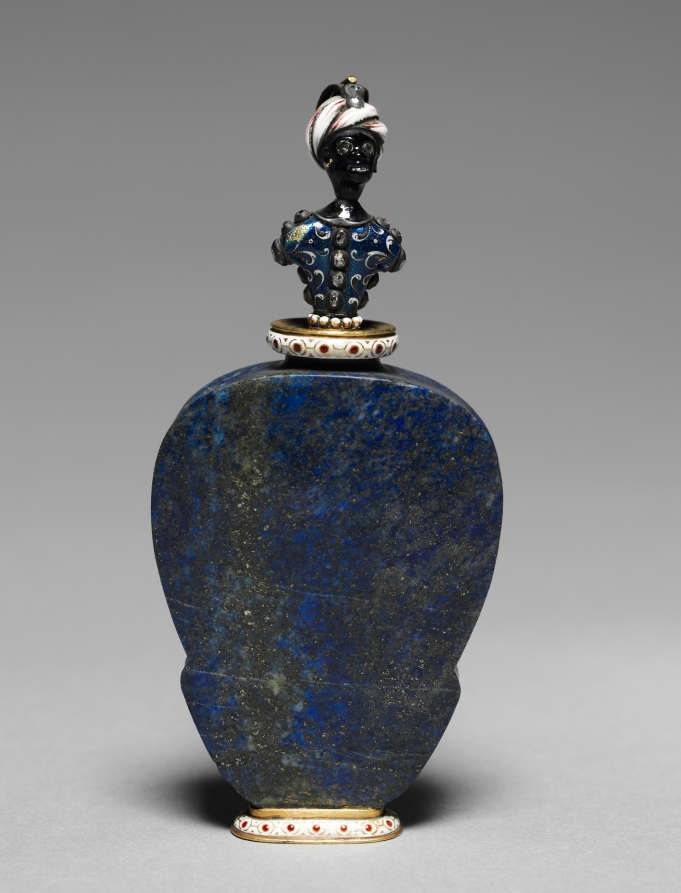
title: Scent Bottle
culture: Continental, 19th century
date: 1800s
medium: lapis lazuli with gold and enameled mounts, enameled and jeweled stopper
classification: Miscellaneous